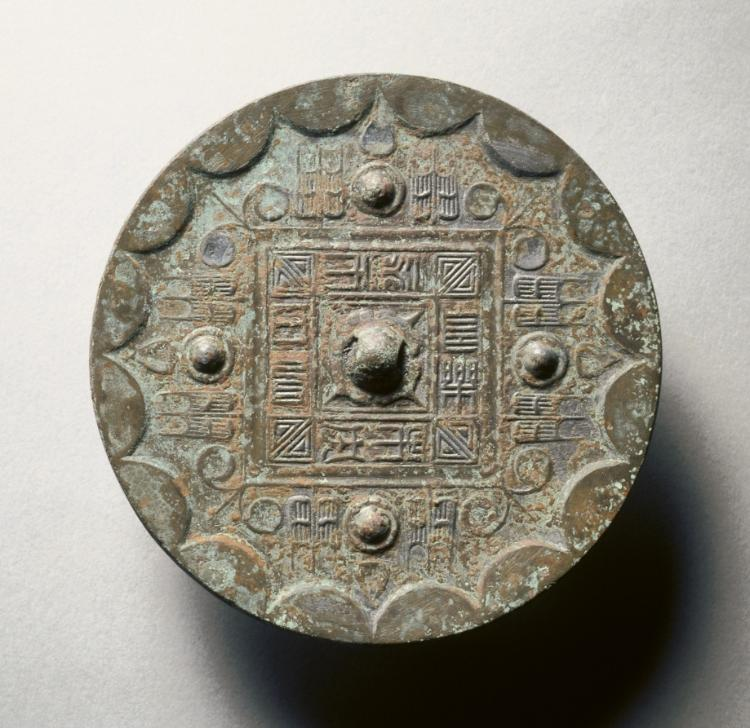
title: Mirror with a Square Band, Four Nipples, and Grass Leaf Motifs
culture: China, Western Han dynasty (206 BCE–8 CE)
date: late 300s BCE–50 CE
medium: bronze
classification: Metalwork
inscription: May you see the light of the sun, and live in everlasting joy.